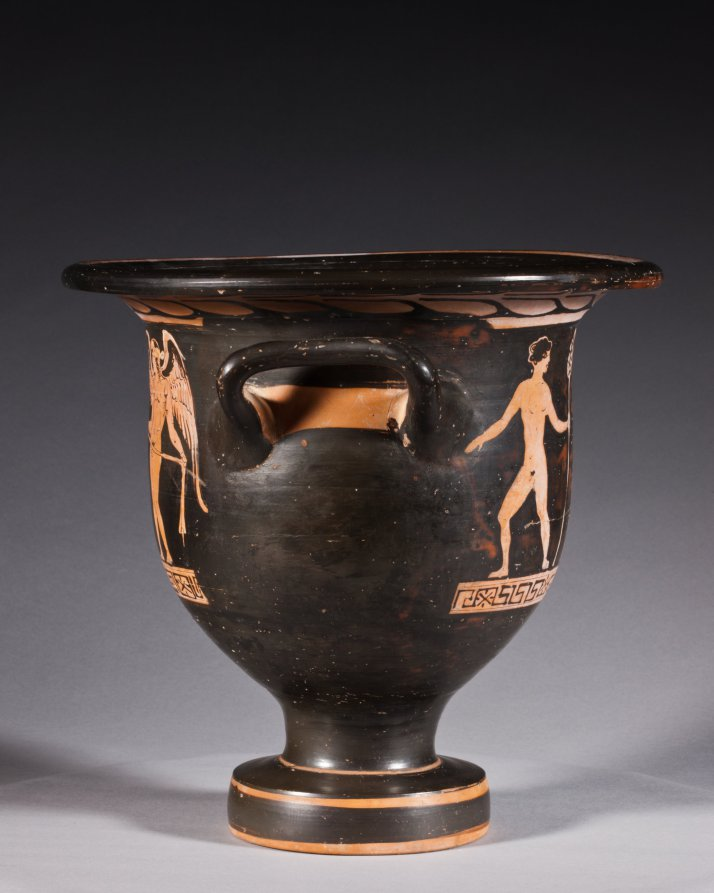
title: Red-Figure Bell Krater (Mixing Vessel): Aphrodite and Eros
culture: South Italian, Apulian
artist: attributed to Graz Painter (South Italian, Apulian, active c. 380–360 BCE)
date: c. 370–360 BCE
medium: ceramic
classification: Ceramic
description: This small mixing vessel shows a finely dressed woman seated on a chest and holding up a mirror to admire herself. Before her stands Eros, the winged god of love, holding a ribbon or sash. Behind the woman stands a pillar with the inscription ΑΦΡΟΔΙΤΗ, or APHRODITE, the goddess of love. Such labels are rare on vases, and scholars debate whether this names the woman shown as Aphrodite herself, with her son Eros, or a bride envisioning herself as Aphrodite, just before her wedding.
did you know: The dancing nude youths on the reverse are unusual; typically they would be standing and draped.